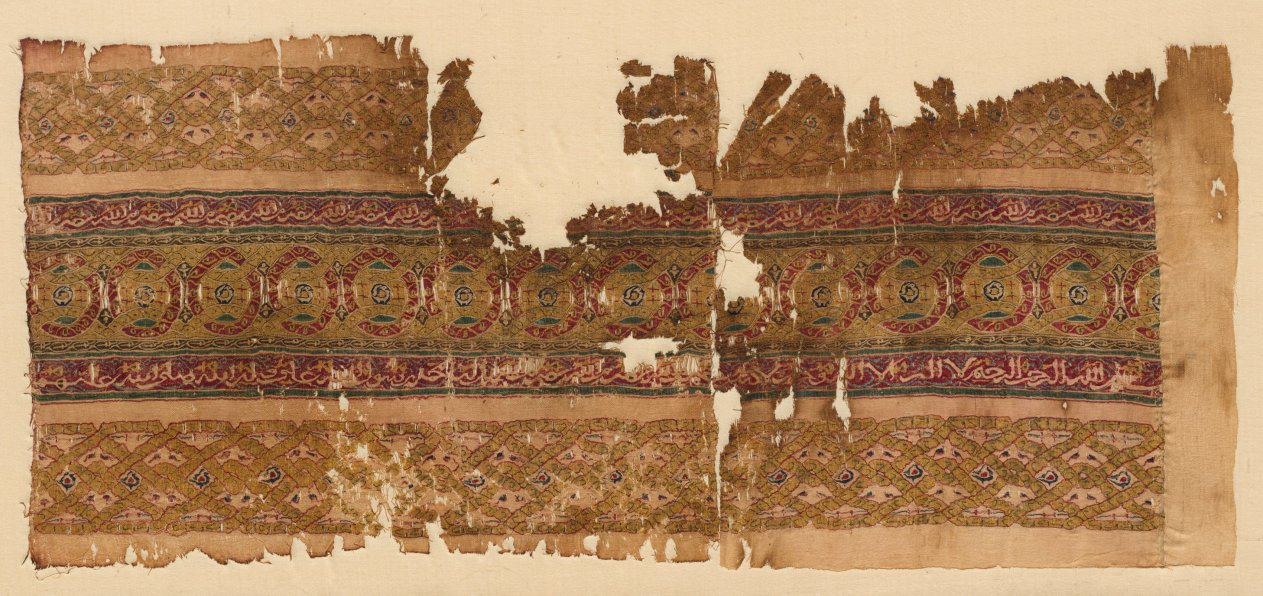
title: Tiraz with guilloche bands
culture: Egypt, Fatimid period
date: 1100s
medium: plain weave with inwoven tapestry weave: linen and silk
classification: Textile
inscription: the top inscription band consists of a repetition over and over of the words: "nasr min Allah (victory is from God.)" The lower inscripton band reads: "Bism Allah al-rahman al-rahim la ilaha illa Allah wahdahu la sharik lahu 'izz min Allah nasr min Allah nasr min Allah barakah Muhammad rasul Allah 'Ali wali Allah sallá Allah 'alayhim[a. . . (In the name of God the merciful, the Compassionate. There is no god but God along; there is no one associated with Him. Glory is from God. Victory is from God. Victory is from God. Blessing. Muhammad is the apostle of God; Ali is the true friend of God, may God bless the[m. . .]."